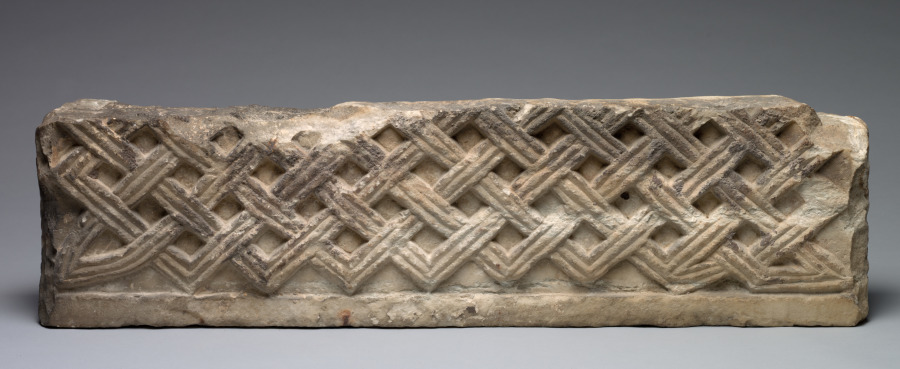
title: Fragment of a Panel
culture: Italy, Rome, Longobardic Style, Migration period, 8th-9th centuries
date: 700s-800s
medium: marble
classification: Sculpture